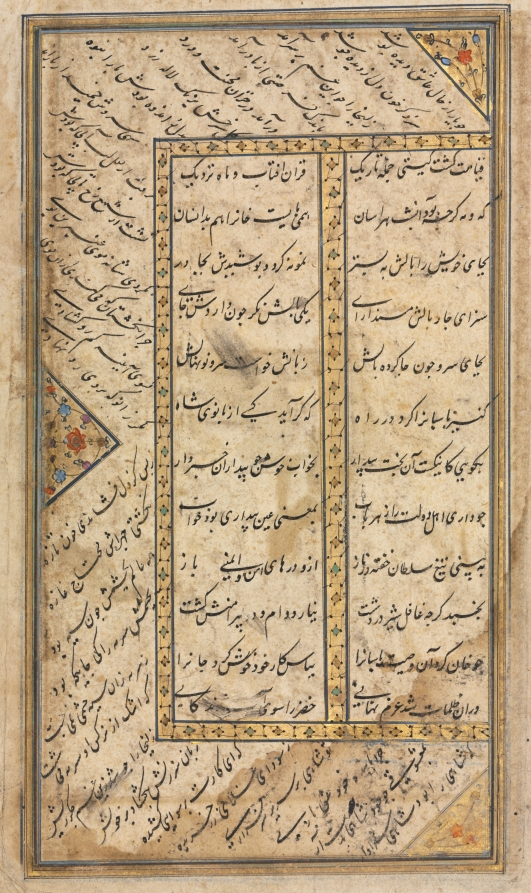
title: Persian verses from a Haft Awrang (Seven Thrones) of Jami (d. 1492) (recto)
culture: Iran, probably Shiraz, Safavid period (1501-1722)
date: mid-1500s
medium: opaque watercolor, ink, and gold on paper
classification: Manuscript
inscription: Script: Nasta'liq